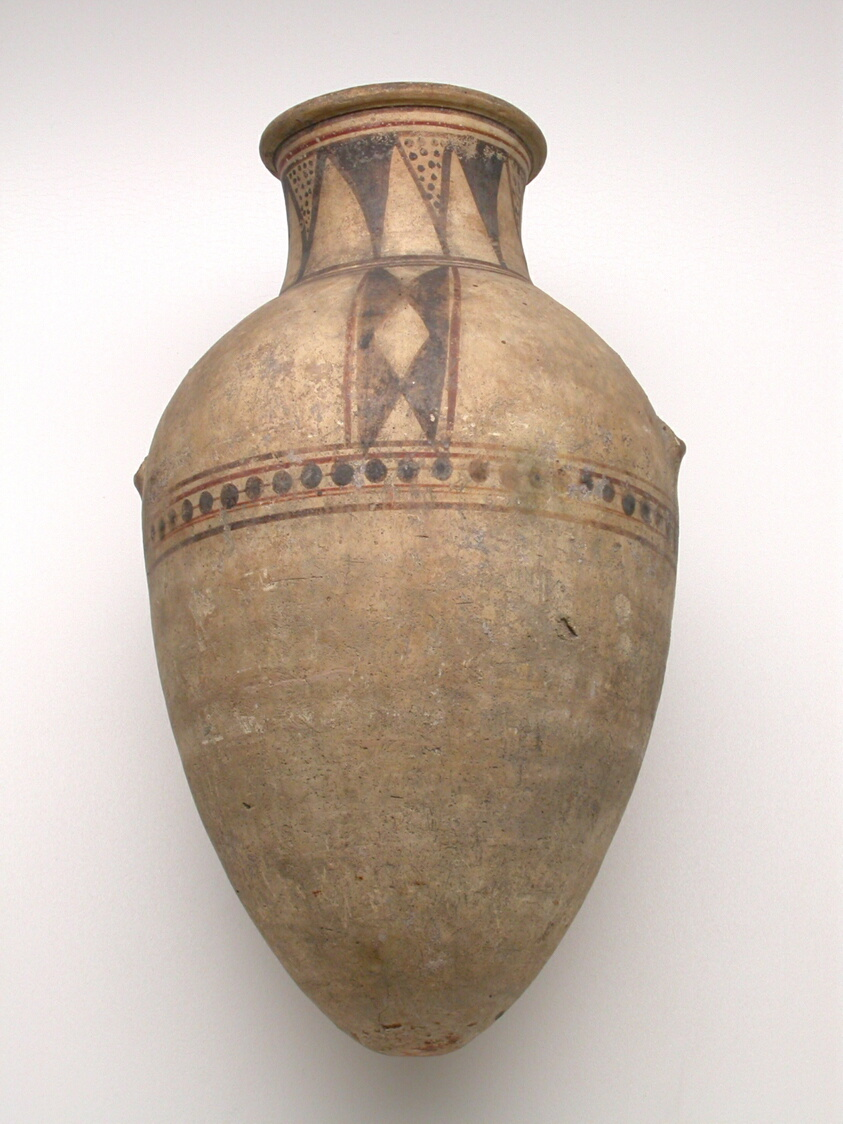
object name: Vessel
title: Amphora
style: new kingdom, egyptian, ancient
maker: Egyptian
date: New Kingdom, Dynasty 18 (about 1550–1295 BCE)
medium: Ceramic, pigment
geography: Egypt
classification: amphora; ceramics; vessel; ancient art; container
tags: dining, drinking